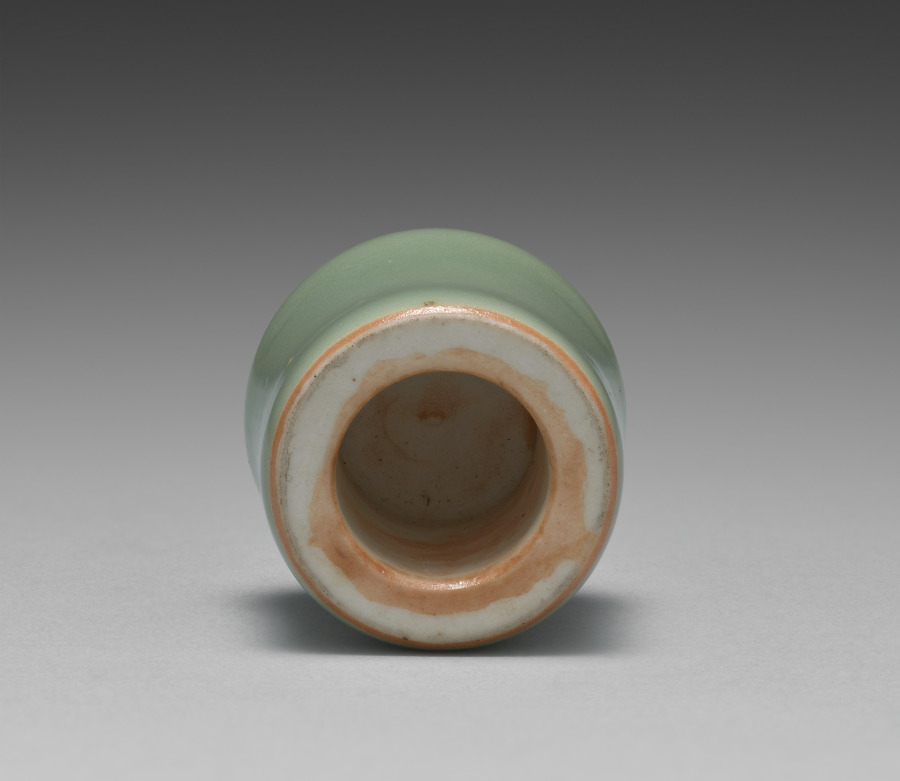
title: Roller End for Hanging Scroll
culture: Japan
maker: Seifū Yohei III (Japanese, 1851–1914)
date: 1893–1914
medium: One of a pair of hanging scroll roller ends; porcelain with celadon glaze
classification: Ceramic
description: Before entering into his apprenticeship with Yohei II, Seifū Yohei III trained as a painter in Osaka. He continued to paint throughout his career as a ceramist. As part of his ceramic practice, Yohei III also made roller ends to be placed at either end of the wooden dowel around which the lower part of a hanging scroll mounting is wrapped. These served both as weights for the painting and as knobs for handling it when rolling and unrolling. The pair here is made of porcelain with a green glaze.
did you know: This is one of two roller ends for the hanging scroll by Seifū Yohei III, Rain Clearing over a Summer’s Mountain, CMA 2022.151.